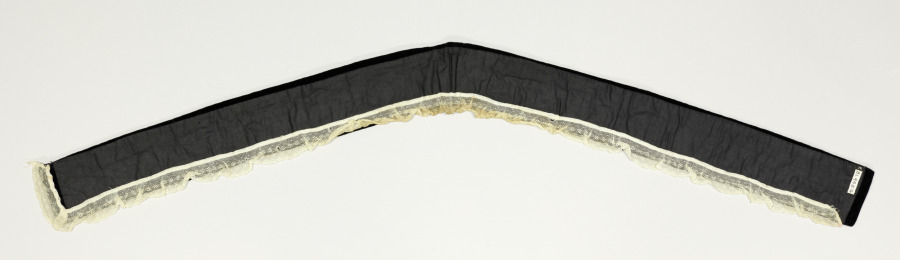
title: Woman's Costume (Collar)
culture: Italy, Sicily, 19th century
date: 1800s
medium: velvet (black) with metal thread embroidery and lace edging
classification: Garment